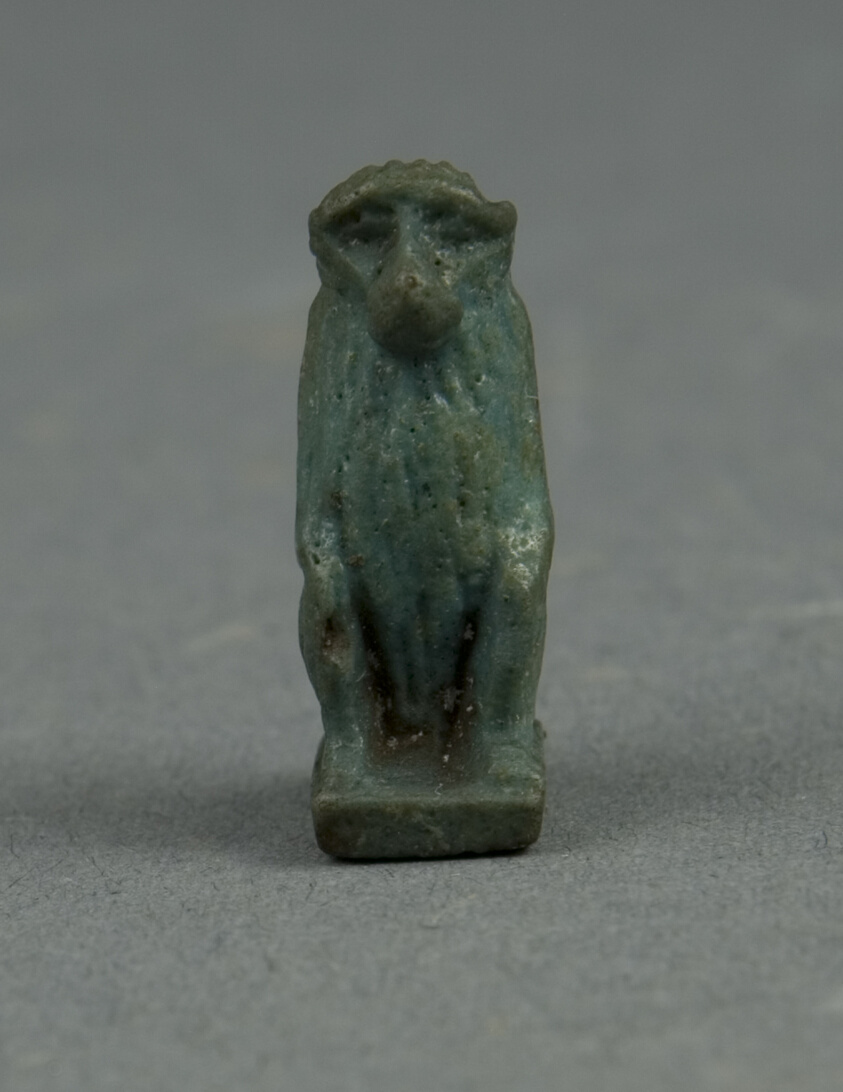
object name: Costume and Accessories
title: Amulet of an Ape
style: third intermediate period, egyptian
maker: Egyptian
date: Third Intermediate Period, Dynasty 21–25 (1070–656 BCE)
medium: Faience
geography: Egypt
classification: amulet; jewelry; ceramics; ancient art; costume; faïence (composite material)